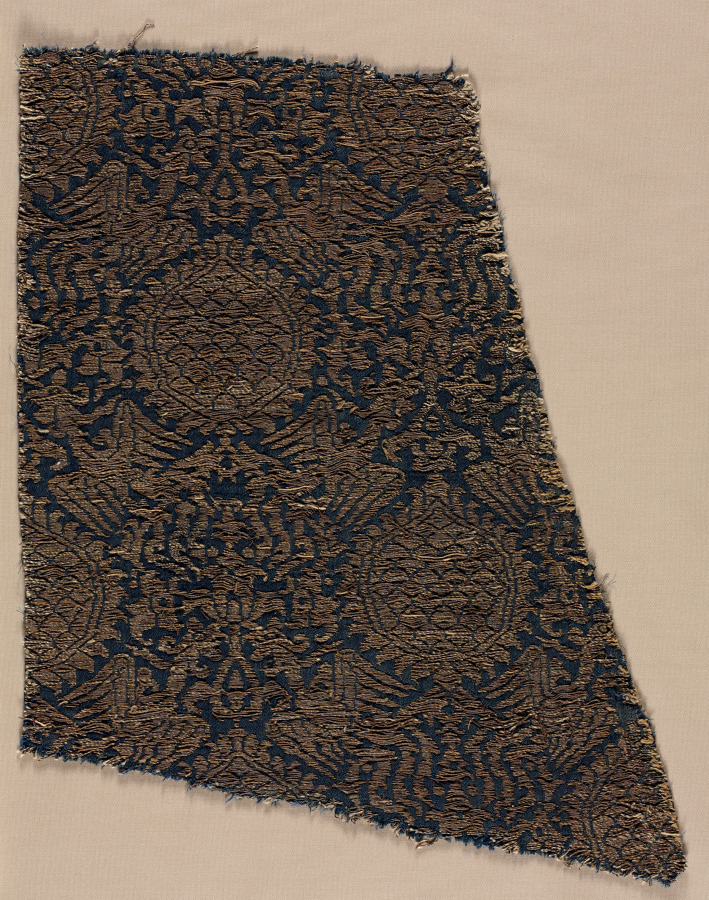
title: Lampas with phoenixes and palmettes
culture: Iran, Ilkhanid period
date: late 1200s or 1300s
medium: lampas: silk and silver thread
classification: Textile